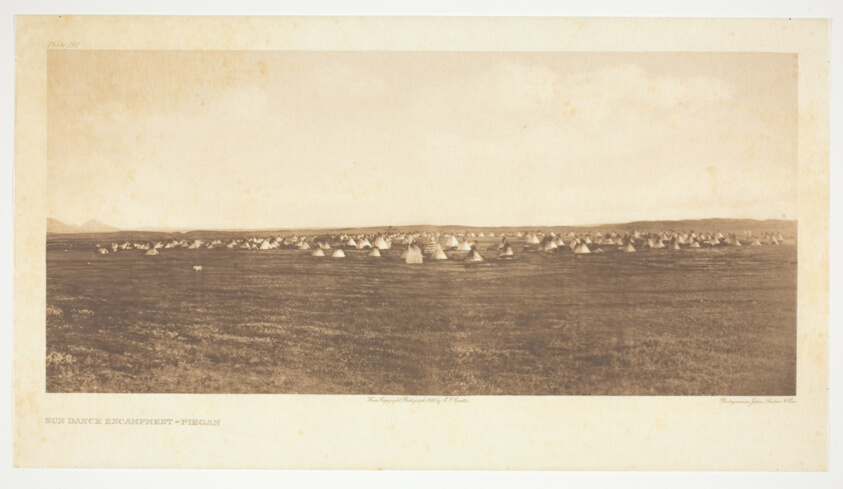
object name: Photograph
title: Sun Dance Encampment-Piegan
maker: Edward S. Curtis (American, 1868–1952)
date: 1900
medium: Photogravure, plate 192 from "The North American Indian, Volume 6" (1911)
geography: United States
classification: photogravure; photomechanical process; photography; photograph